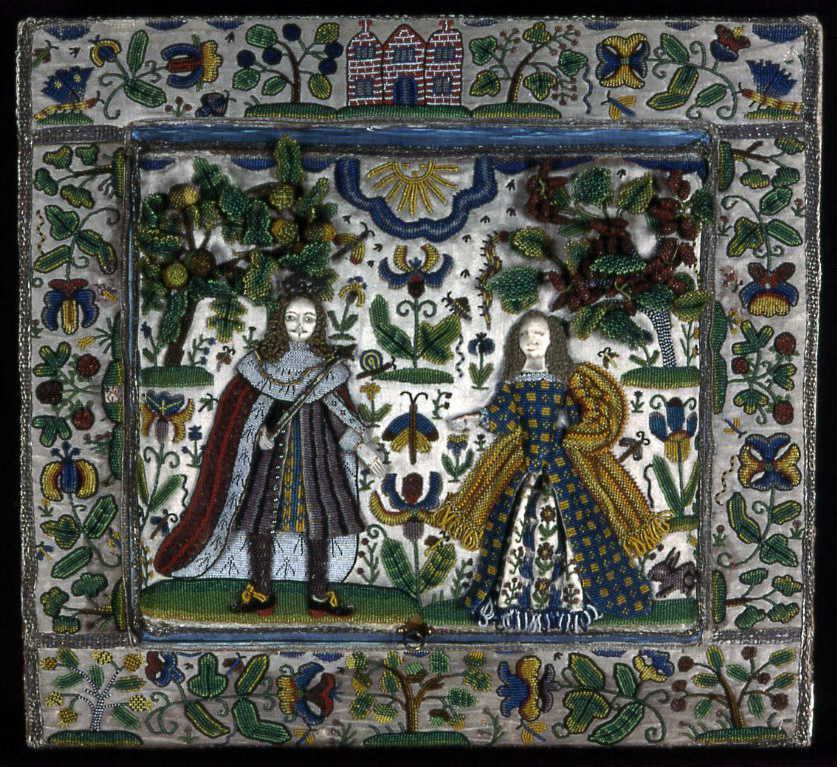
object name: Textile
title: Box (Needlework)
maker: England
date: c. 1670s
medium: Silk, warp-float faced 7:1 satin weave; embroidered with silk and gilt-metal strips in couching; beaded with glass beads; edged with silk and gilt-metal-strip-wrapped silk, plain weave; wooden frame covered with paper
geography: England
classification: textile; needlework (visual works)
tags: people, floral arrangements, flowers